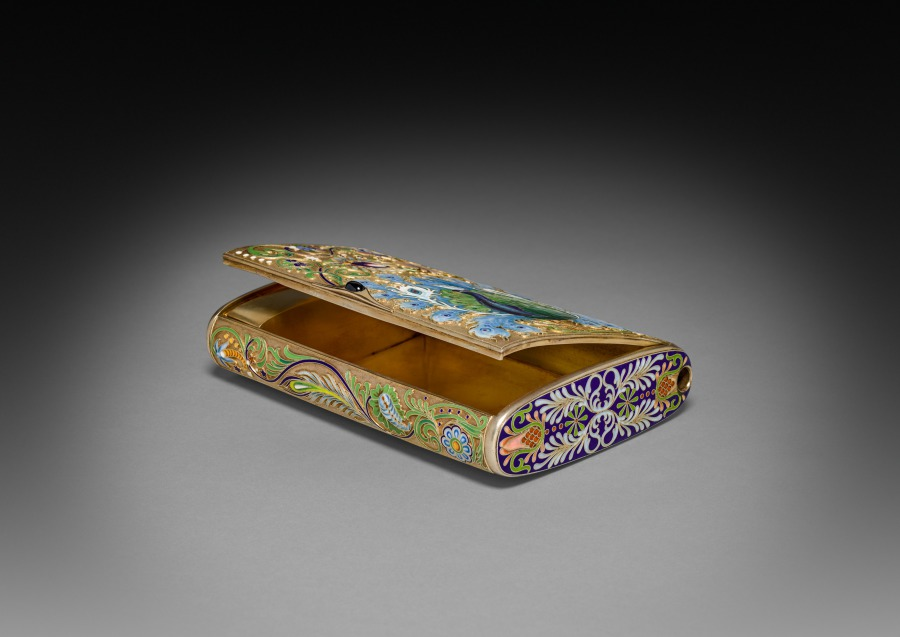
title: Cigar Box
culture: Russia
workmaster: attributed to Feodor Ivanovich Rückert (Russian, 1840–1917)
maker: House of Fabergé (Russian, 1842–1918)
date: c. 1896–1908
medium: Silver gilt, enamel, sapphire set in gold; [reproduction silk tinder cord, gold and moonstone catch]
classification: Silver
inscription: C. Fabergé (in Cyrillic); double-headed eagle [imperial warrant]; 84, Kokoshnik, tester's initials [assay mark for Moscow, 1896-1908]; scratched 16358.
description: Fabergé’s craftsmen in Moscow became known for their work in the pan-Slavic or neo-Russian taste, hearkening back to 17th-century styles of Russian folk decoration. In this whimsically oversized box for cigars or loose tobacco, Fabergé used the technique to highlight a symbol of imperial royalty, the preening peacock, here rendered in brilliant hues of blue and green enamels.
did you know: Peacocks were considered a symbol of imperial royalty in Russia.